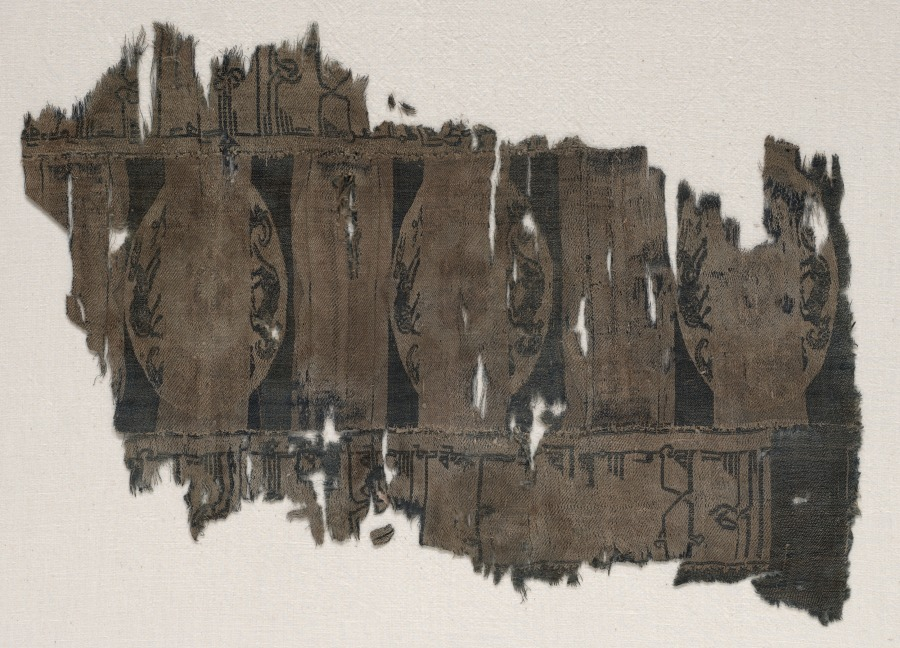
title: Fragment with running animal roundels and kufic inscriptions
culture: Iran, in the style of the Buyid period (945–1055)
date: 1530–1950 (radiocarbon date, 95% probability)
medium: Silk: lampas weave, brocaded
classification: Textile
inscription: [daygha]m wa-kam asadan rawwa'a juhur kilab aya asadan fi jismihi ruh. . .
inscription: . . .aya asadan fi jismihi ruh daygham wa-kam asadan rawwa'a [ju]hur kilab aya asadan fi. . .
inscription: inni i'taqadtu bi-wa'idka wa-'adlika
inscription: wa-arhab ihsanika [wa-fad]lika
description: This fragment preserves a wide central band flanked by narrower inscription bands. The narrower bands contain, on a dark blue background a continuous inscription in elaborate Kufic, the ivory-colored lettering oriented at right angles to the warp. On the wider ivory panel there appear ovals enclosing a frieze of running animals within which are hexagons enclosing stars. The ovals alternate vertically with cartouches containing an inscription in simple Kufic, the design appearing in blue, pink, and ivory.